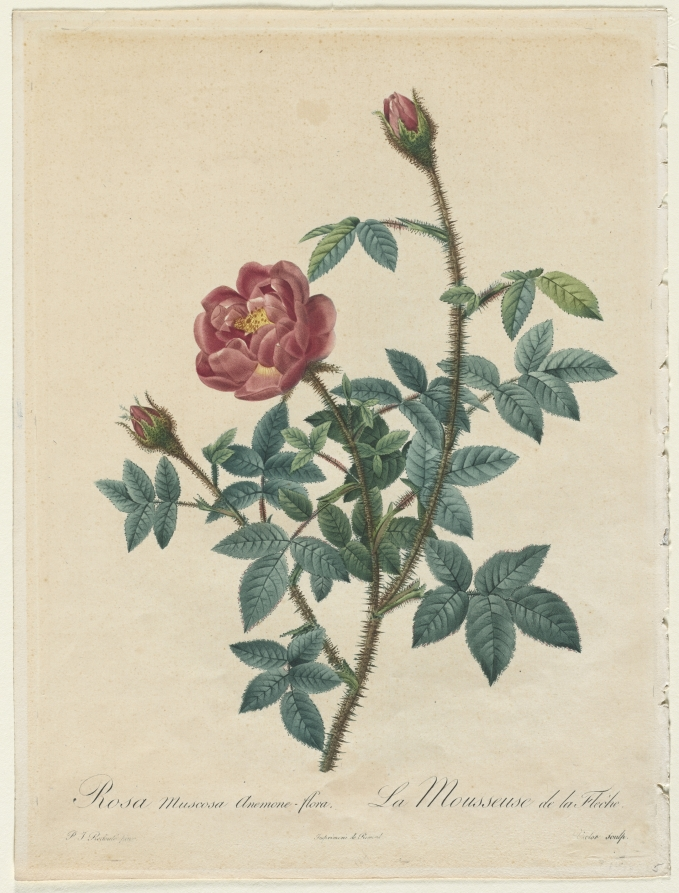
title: Moss Rose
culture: France, 19th century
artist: Henri Joseph Redouté (French, 1766–1853)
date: 1817–1824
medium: stipple and line engraving, with hand coloring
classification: Print